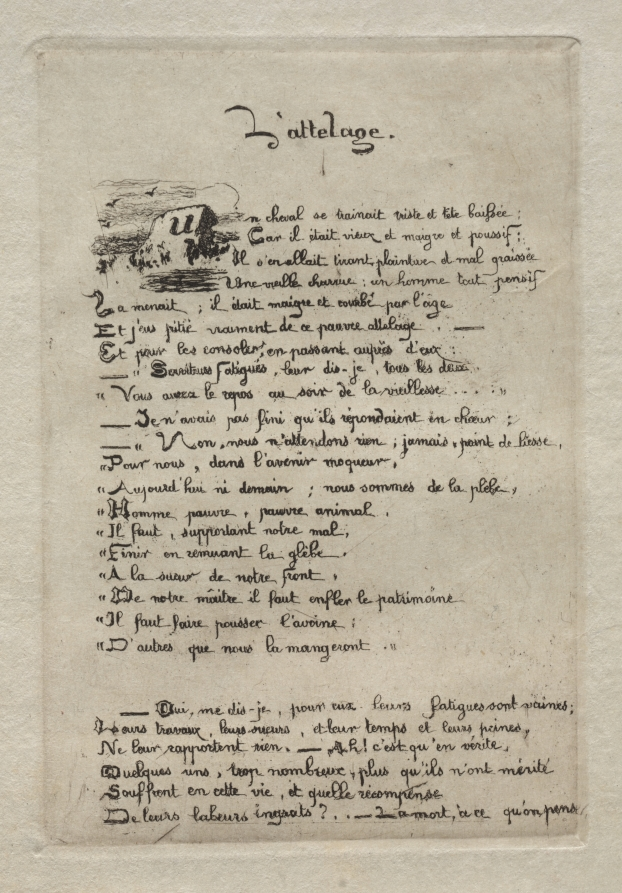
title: The Ploughman and his Horse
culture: France, 19th century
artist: Charles Meryon (French, 1821–1868)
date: 1854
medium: etching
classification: Print